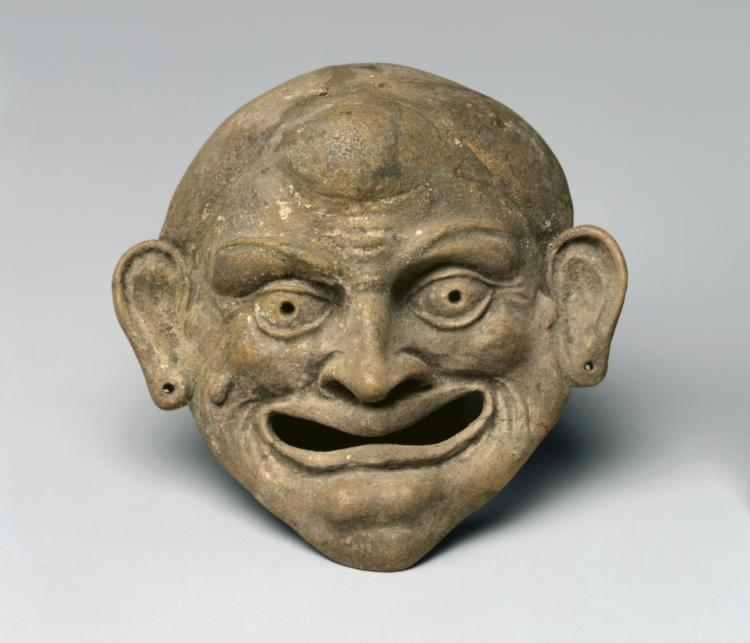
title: Mask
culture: Italy, Roman (?)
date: 1–100 CE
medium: terracotta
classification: Sculpture